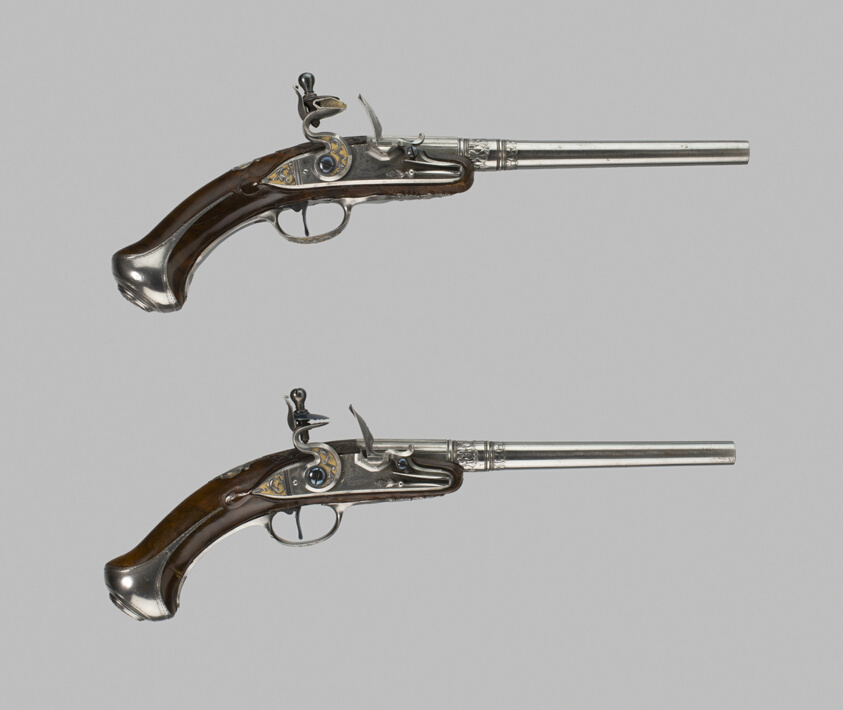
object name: Arms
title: Flintlock Turn-Off Holster Pistol (One of a Pair)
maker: Barrel Smith: Domenico Bonomino; (Italian, about 1635-c. 1700); Gunsmith: Johann Casimir Tanner; (German, 1691- 1764); Barrel: Brescia; lock and stock: Sonderhausen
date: 1680/90 and 1732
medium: Steel, gilding, lead, flint, walnut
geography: Germany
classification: firearm-handgun; arms; arms and armor